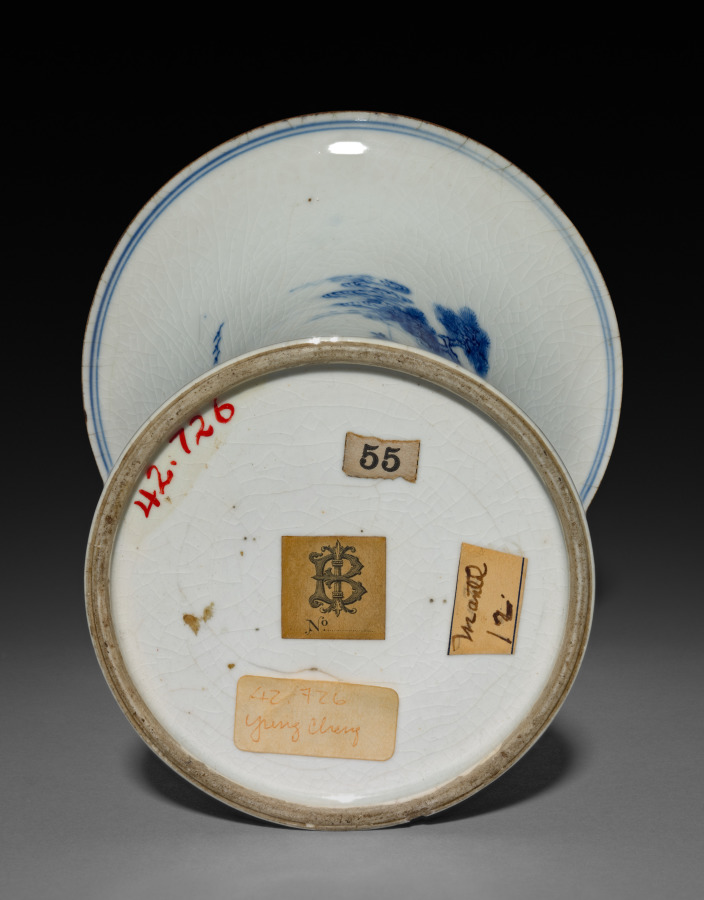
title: Beaker Vase in Form of Archaic Gu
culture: China, Jiangxi province, Jingdezhen kilns, Qing dynasty (1644-1911), Yongzheng reign (1723-35)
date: 1723–35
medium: porcelain with underglaze blue decoration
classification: Ceramic